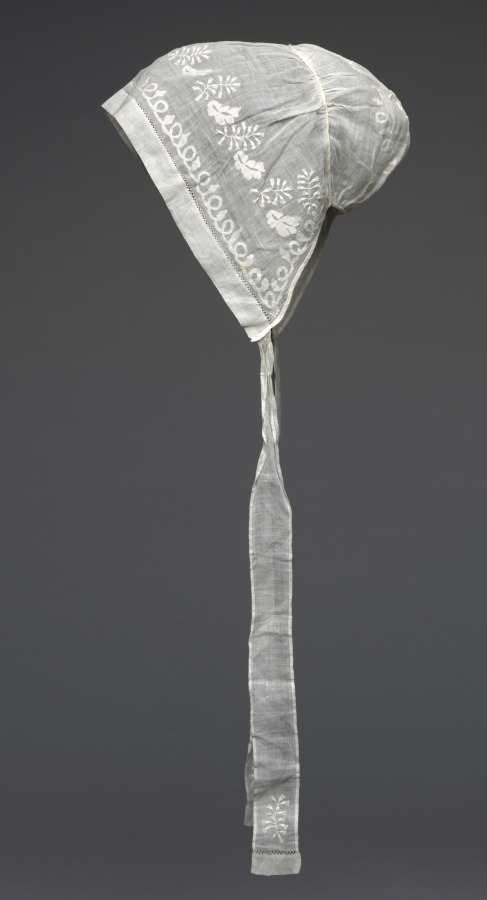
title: Infant's Cap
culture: America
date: 1800–1850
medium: Plain weave linen: needle lace (cutwork and drawn work) and embroidery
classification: Embroidery